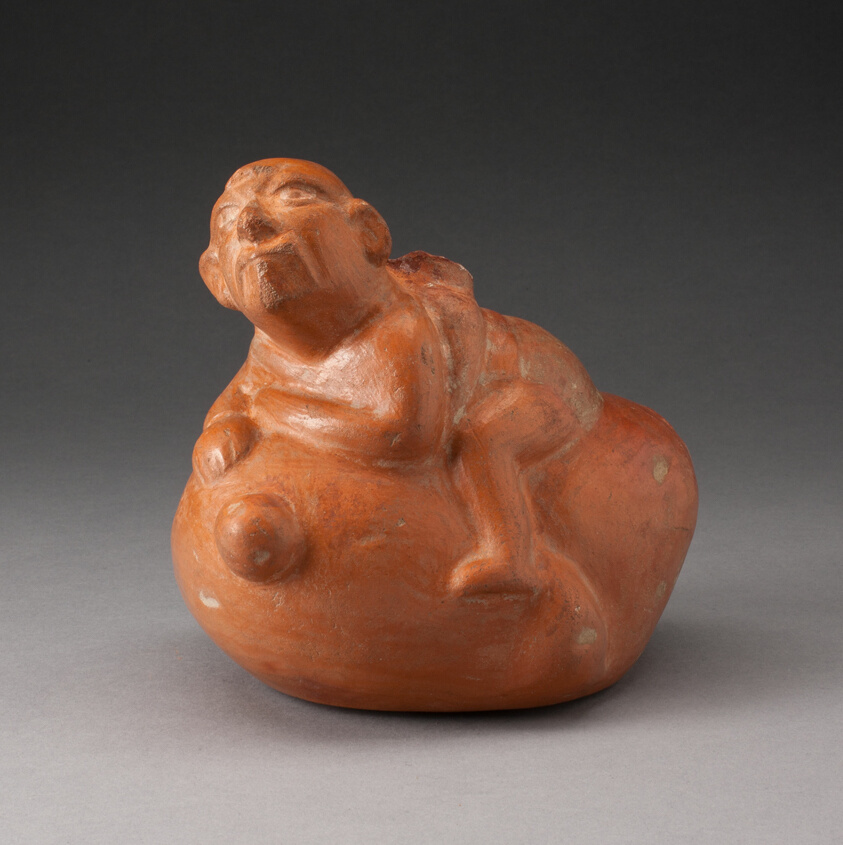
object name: Vessel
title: Stirrup Spout Vessel in Form of a Man Sitting atop a Vegetable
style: moche, mochica iii, mochica, early intermediate period, Pre-Columbian, americas, Arts of the Americas, andean, andes, south american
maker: Moche (North coast, Peru)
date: 100 BCE–500 CE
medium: Ceramic and pigment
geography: Peruvian North Coast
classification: earthenware; ceramics; vessel; art of the americas